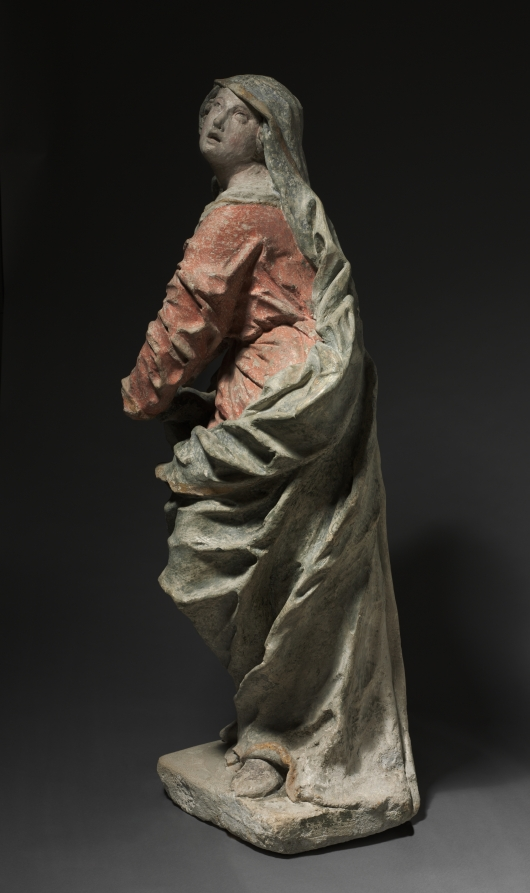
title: Mourning Mary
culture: Austria, Vienna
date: c. 1710–40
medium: stone with traces of original color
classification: Sculpture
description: This figure’s orientation suggests it may have been part of a Crucifixion group, situated to the left of Christ with another figure to the right to balance the composition. Fingers knotted in prayer, lips parted in anguish, the Virgin appears to recoil from the sight of her son on the cross. Her contorted pose and agitated draperies are visible manifestations of her grief. Obvious signs of wear to the stone suggest that the group may have been set outside of a church, perhaps atop pillars.